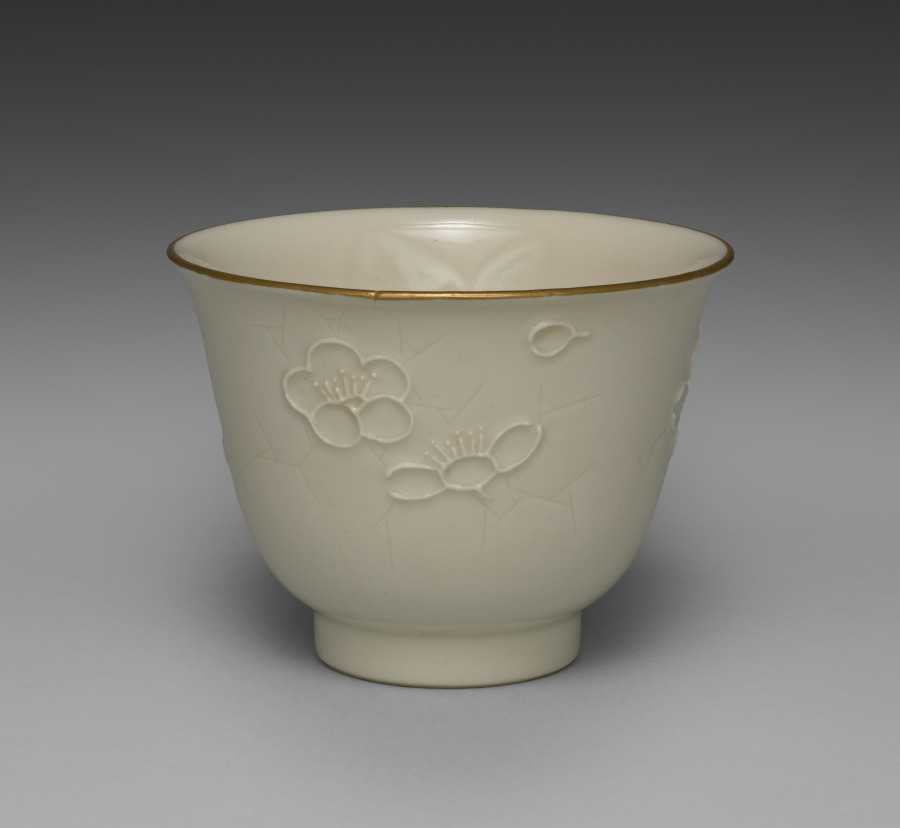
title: Drinking Cup from Dining Set with Plum Blossoms and Cracked-Ice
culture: Japan, Meiji period (1868–1912)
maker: Seifū Yohei II (Japanese, 1844–1878)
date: c. 1875–78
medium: Porcelain with molded designs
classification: Ceramic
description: Each item in this set has a delicate low-relief design of flowering plum branches over scattered, intersecting lines meant to resemble the cracked-ice surface of a frozen body of water and is signed on the base in gold pigment. While Yohei II produced many fine works in underglaze blue, like those produced by Kiyomizu Shichibei, he also made works in quite different styles later in his career, from the early 1870 s. In 1873, he was appointed purveyor to the Industrial Center of Kyoto Prefecture, a designation associated with Kyoto’s efforts to reach an international market through the port of Kobe; and from 1875 until his death, he was involved in national-level projects to present Japanese ceramics across the world. It was during this period that Yohei III was apprenticed to Yohei II, and it has been suggested that this set may in fact be an early example of Yohei III’s work, which he signed with his teacher’s name. Decorated with flowers resembling Japanese textile motifs, the set calls to mind the design of Yohei II’s pair of vases with plum blossoms in the Victoria and Albert Museum. Here, the elaborate trees created for a formal public exhibition setting have been translated into the approachable blossoms of the genteel domestic environment. While the designs are consistent across the pieces, each raised flower petal and pistil and each incised line in the ice was done by hand, so the cups, bowls, and dishes are similar yet unique. The bottoms of two boxes once identified the set’s owner, but the information has been deliberately obscured with black ink. However, inscriptions still visible appear to indicate two occasions, once at the end of July 1886 , and once again in June 1916 , when parts of the set were requested from Hokura in Niigata Prefecture. The location corresponds to a neighborhood in the present-day city of Jōetsu. The surname Tsuji 辻 also appears on a paper tag affixed to one of the box cloths. Future research may possibly reveal more about their provenance. A vase by Yohei III in a private collection combines the formal grandeur of the Yohei II vases in the Victoria and Albert Museum with the gentler design of this dining set, placing flowering plum trees against soft, scalloped-edge clouds resembling those in golden screens.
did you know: The dining wares have a creamy white coloration that the four boxes containing them identify as Korean in style.